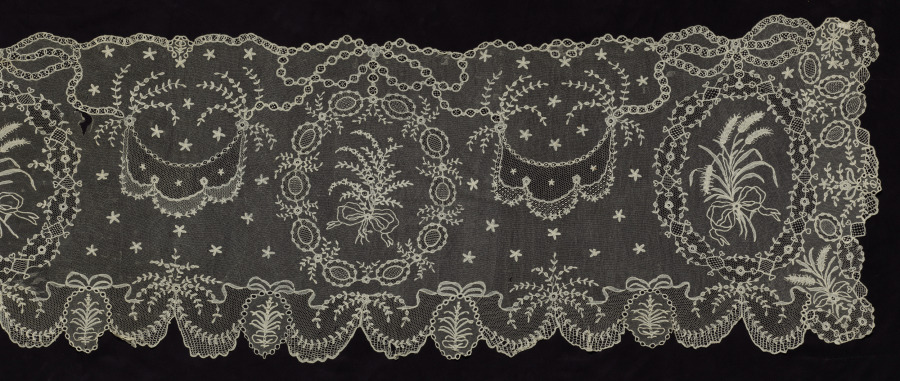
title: Lace Scarf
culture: Belgium, Brussels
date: 1750–99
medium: Bobbin lace (appliqué on net)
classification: Lace